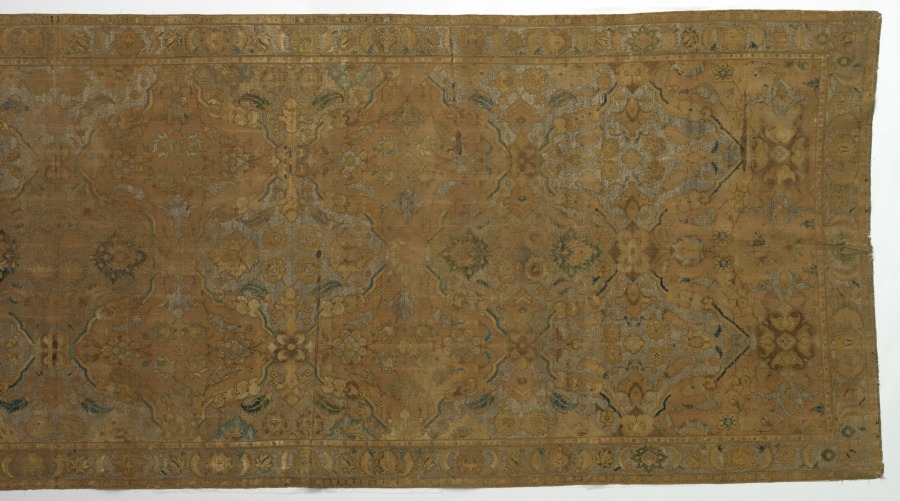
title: Carpet, so-called "Polonaise"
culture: Iran, 17th century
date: 17th century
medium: senna knot: silk, silver and gold filé brocading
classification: Carpet